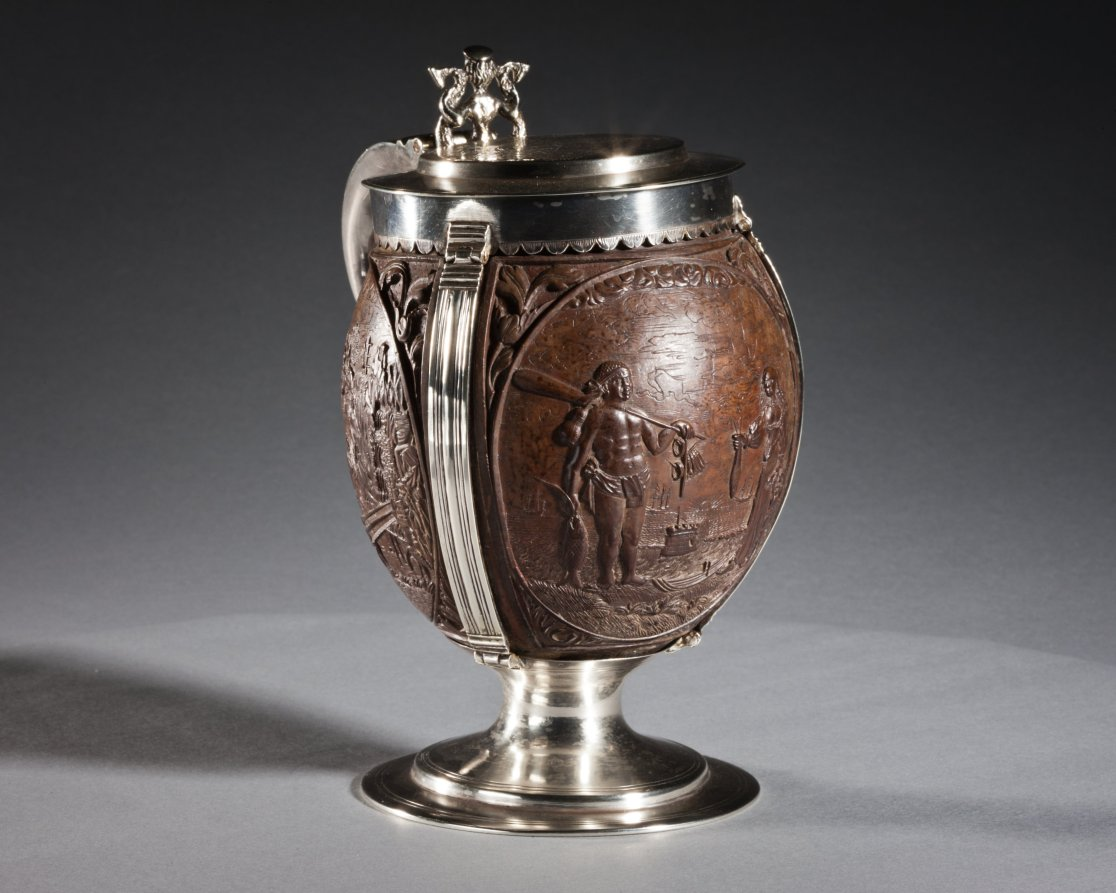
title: Coconut Cup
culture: carved coconut, probably The Netherlands; silver mount, probably England, 17th century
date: c. 1630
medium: carved coconut in silver mount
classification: Metalwork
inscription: top lid has engraved coat-of-arms, underside of lid has inscription: George Lewis TIVERTON Feby, 1st 1760.